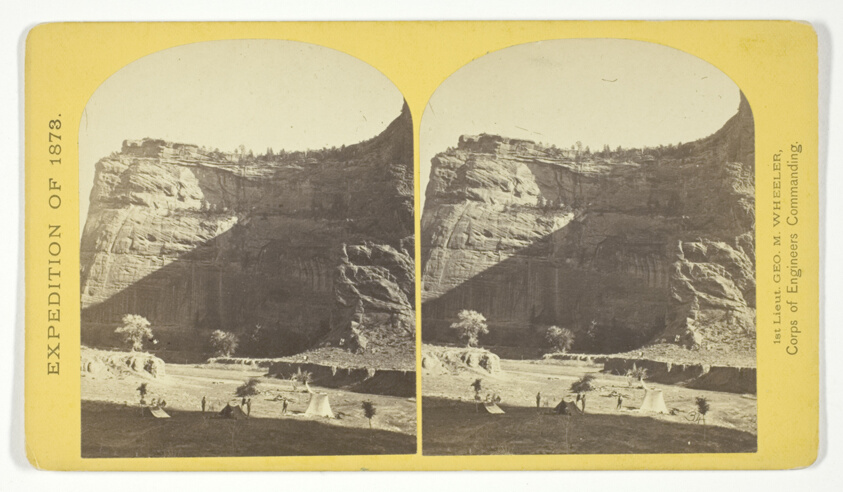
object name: Photograph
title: Circle Walls, Cañon de Chelle. Here the Cañon bends from an easterly direction nearly due north, the walls maintaining a perpendicular height of about 1.200 feet, No. 22 from the series "Geographical Explorations and Surveys West of the 100th Meridian"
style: 19th century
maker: Timothy O'Sullivan (American, born Ireland, 1840–1882); commissioned by George Wheeler for the War Department, Corps of Engineers, U.S. Army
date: 1873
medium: Albumen print, stereo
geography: United States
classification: stereograph (albumen); photography; photograph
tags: Collected by Hugh Edwards, Geographical Explorations and Surveys